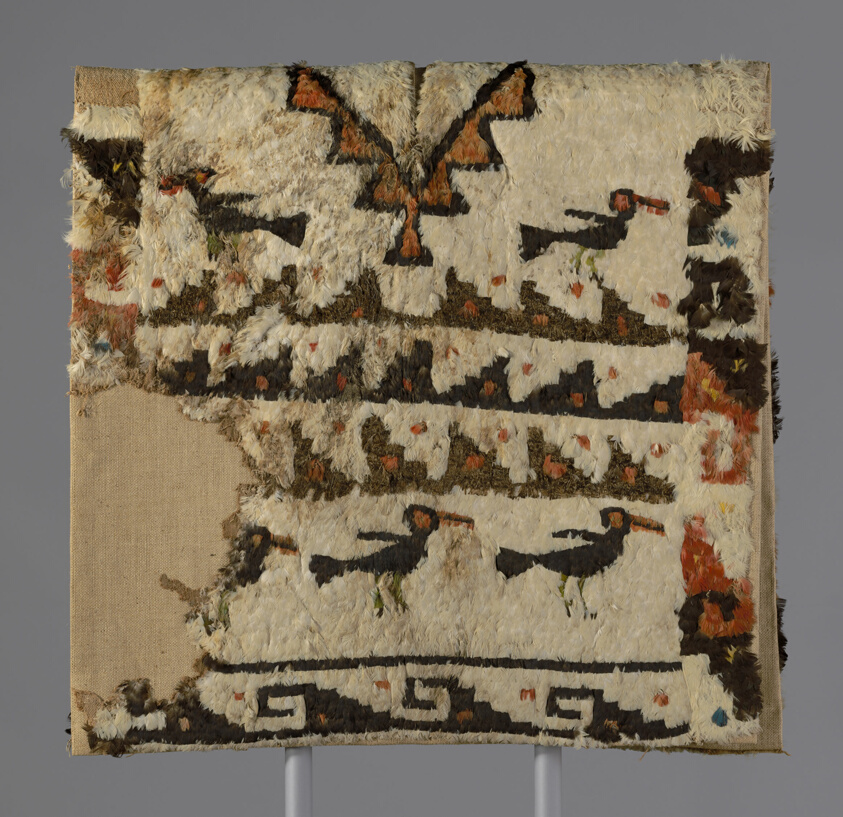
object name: Textile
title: Feathered Tunic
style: chimú, nazca, early intermediate period, Pre-Columbian, americas, andean, andes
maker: Chimú (Peru, south coast, Possibly Nazca Valley,)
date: 1470/1532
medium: Cotton, plain weave; embellished with feathers knotted and attached with cotton in overcast stitches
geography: Peru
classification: tunic; needlework (visual works); textile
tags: animals, fish, birds, cats, feline, stepped motif, triangles